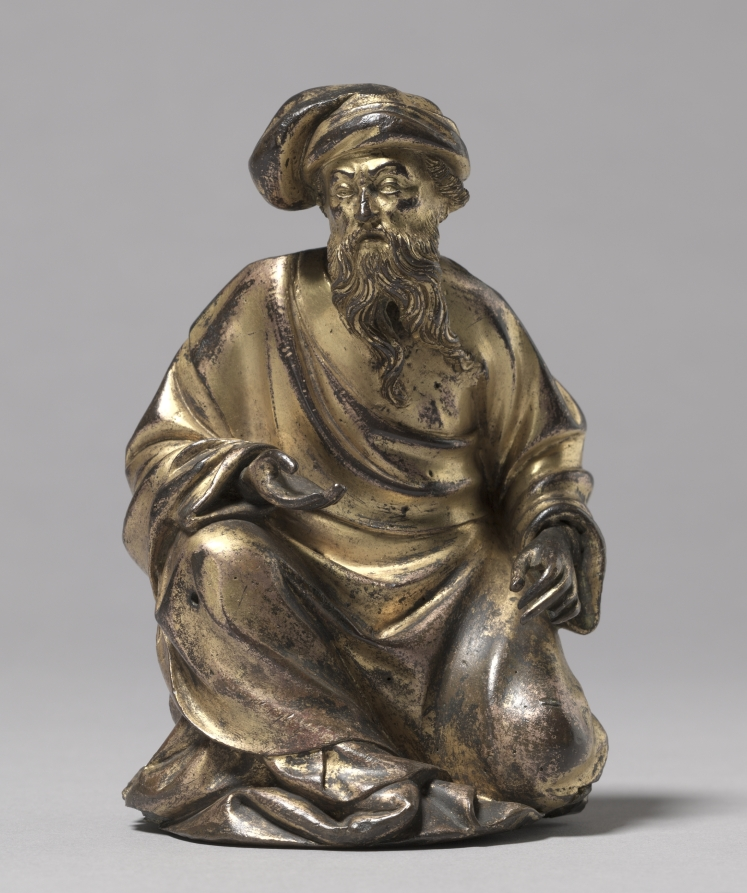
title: Kneeling Prophet from the Reliquary Chasse of Saint-Germain-des-Prés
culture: France, Paris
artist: Jean de Clichy (French)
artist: Gauthier du Four (French)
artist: and Guillaume Boey (French)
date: 1409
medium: gilt bronze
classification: Sculpture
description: This figure is one of only two known surviving fragments of the Reliquary Châsse of Saint-Germain. Fashioned from silver, gold, and precious stones, it was designed to hold the body of the saint. A contract from 1409 gives the names of the commissioned goldsmiths: Jean de Clichy, Gautier du Four, and Guillaume Boey.The reliquary was housed in the ancient Benedictine Abbey of Saint-Germain-des-Prés in Paris and formed the monastery’s great treasure until it was destroyed in the French revolution. The exquisite modeling of the prophet, originally a supporting foot of the reliquary, reveals the sophistication of Paris around 1400.